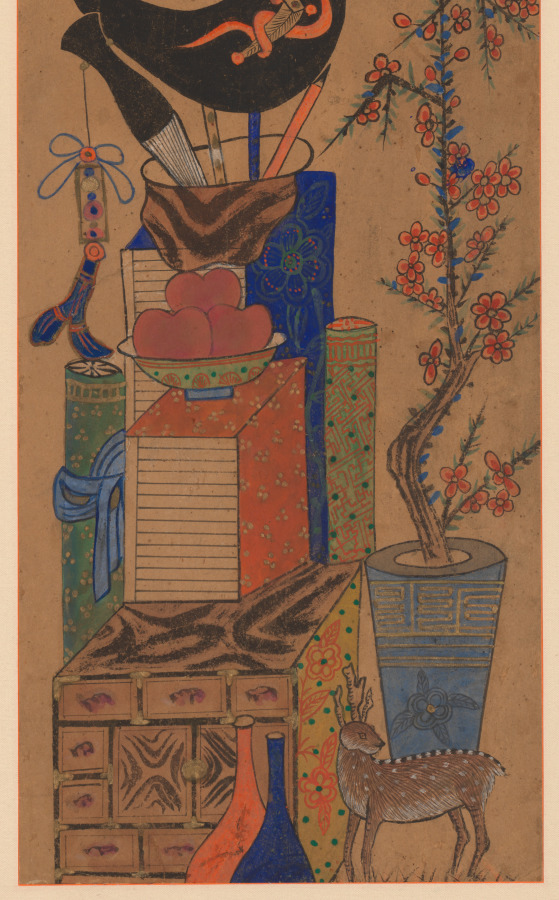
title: Munja-Chaekgeori Screen (Character-Books Screen)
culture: Korea, Joseon dynasty (1392–1910)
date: early 1900s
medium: Eight-panel folding screen, ink on paper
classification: Painting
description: This folding screen is a whimsical harmony of two different subjects: chaekgeori, or books and things; and munja, or characters. The lower section of each panel depicts the imagery of things, including books, decorative arts, and utilitarian objects. The upper portion of each panel bears a classical Chinese character. Read from far right to left, the eight characters refer to the values of Confucian teachings of the Joseon dynasty: filial piety, brotherly love, loyalty, trust, propriety, righteousness, modesty, and humility. While these two pictorial genres are harmoniously conjoined on the same picture plane, two sharply contrasting world views—urban consumerism and traditional Confucian ethics that despise materialism—compete with one another.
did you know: The eight Korean characters each mean filial piety, brotherly love, loyalty, trust, propriety, righteousness or justice, modesty or integrity, and humility or the feeling of shame.